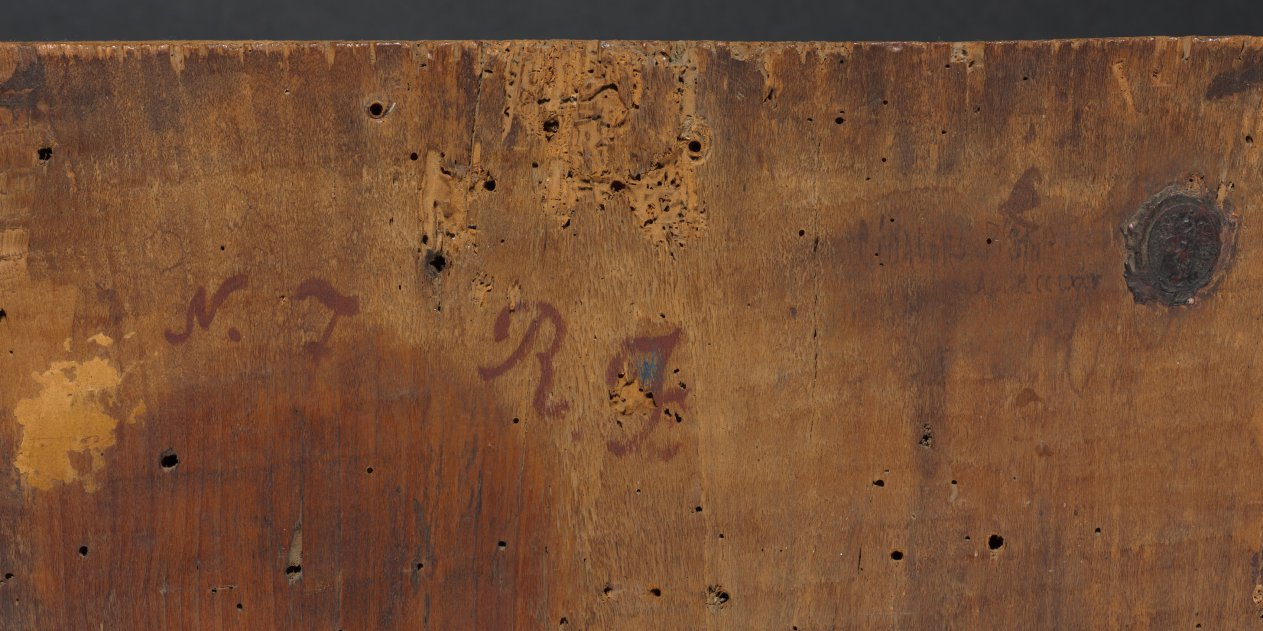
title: Icon of the Mother of God and Infant Christ (Virgin Eleousa)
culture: Republic of Venice, Kingdom of Candia, Candia (Heraklion, Crete, Greece) or Byzantine Empire, Constantinople (Istanbul, Turkey)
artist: attributed to Angelos Akotantos (Cretan, died 1450)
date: c. 1425–50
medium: tempera and gold on wood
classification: Painting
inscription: None visible on obverse; unidentified inscriptions on reverse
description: This large icon of a tender embrace between the Virgin Mary and Christ likely hung on a Greek Orthodox church’s iconostasis, a screen separating the congregation from the altar-containing sanctuary, which only clergy could enter. A skilled painter of faces and draperies, Angelos Akotantos was among Crete’s most sought-after artists. Based in Byzantium’s artistic center in his hometown of Candia, he painted for imperial clients and beyond. Despite theological differences, Cretan icons of Mary were popular in Ethiopia. In the early 1500s, Emperor Lebna Dengel sent monks Zekre and Pawli to acquire Cretan icons for him. Twenty-nine Cretan icons are still venerated (honored) in Ethiopian churches.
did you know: This is the only known work by Angelos Akotantos in the United States.